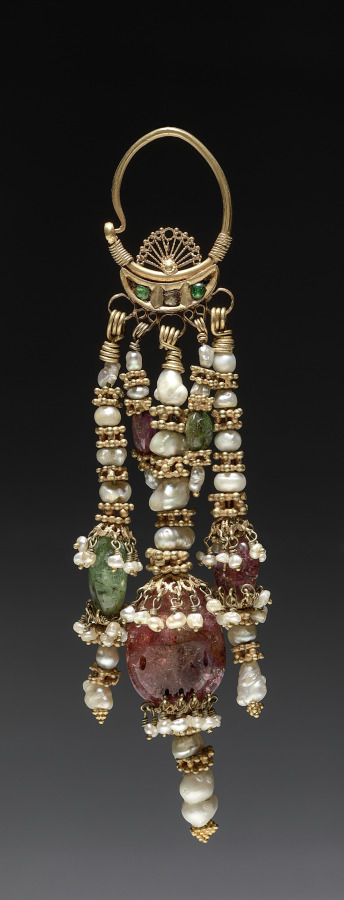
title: Earring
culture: Uzbekistan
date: 1700s–1800s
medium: silver gilt with pearls, gold beads and crystal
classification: Jewelry